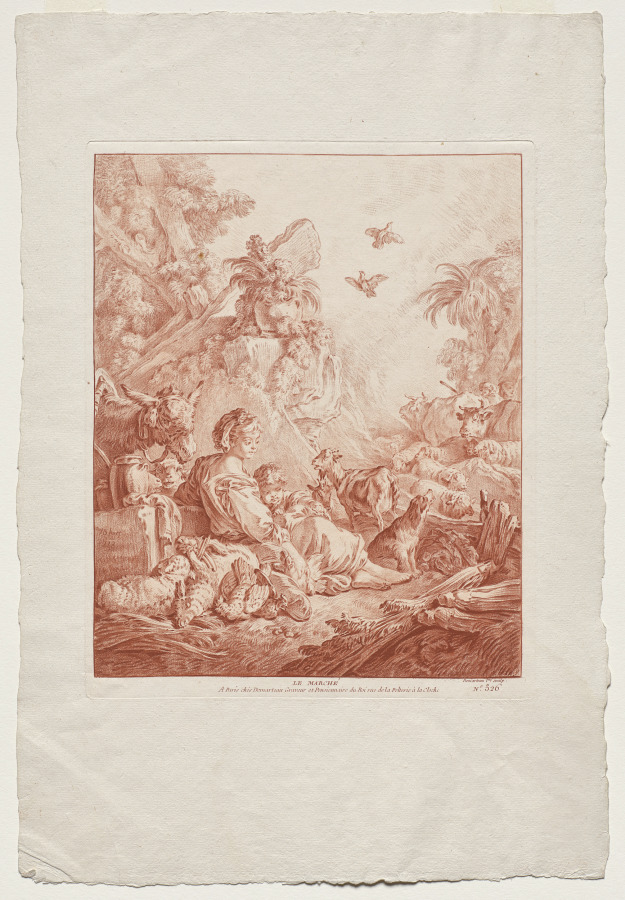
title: The Market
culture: France, 18th century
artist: Gilles Demarteau (French, 1722–1776)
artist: after Jean-Baptiste Marie Hüet (French, 1745–1811)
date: 1700s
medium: chalk manner etching and engraving printed in sanguine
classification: Print